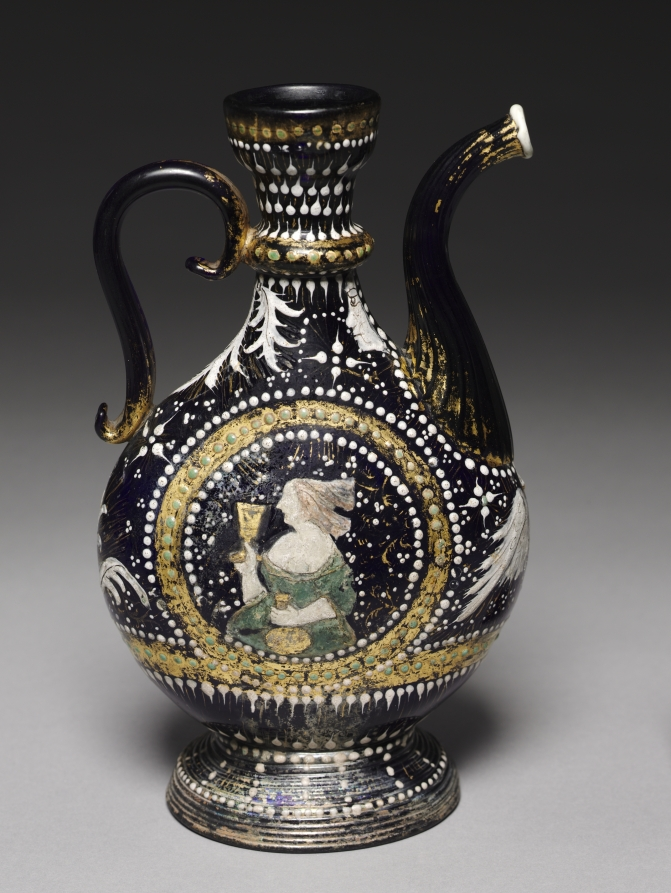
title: Ewer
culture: Italy, Venice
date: c. 1480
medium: enameled lapis-blue glass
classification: Glass